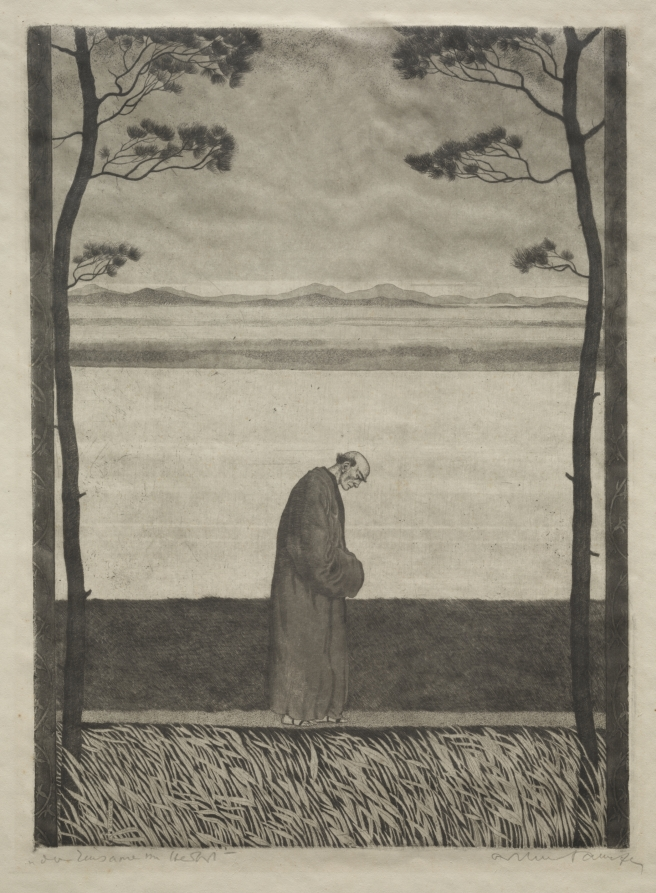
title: Untitled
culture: Austria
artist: Arthur Paunzen (Austrian)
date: 1900–1910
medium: etching and aquatint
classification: Print